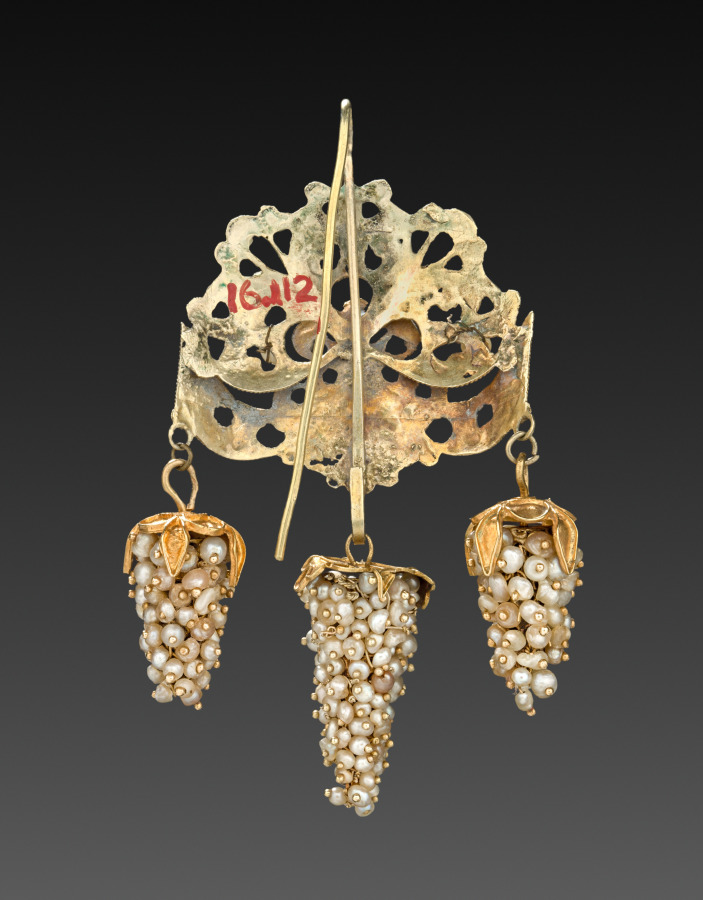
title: Earring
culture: Italy, Naples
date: 1700s–1800s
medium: gold and enamel with pearls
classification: Jewelry